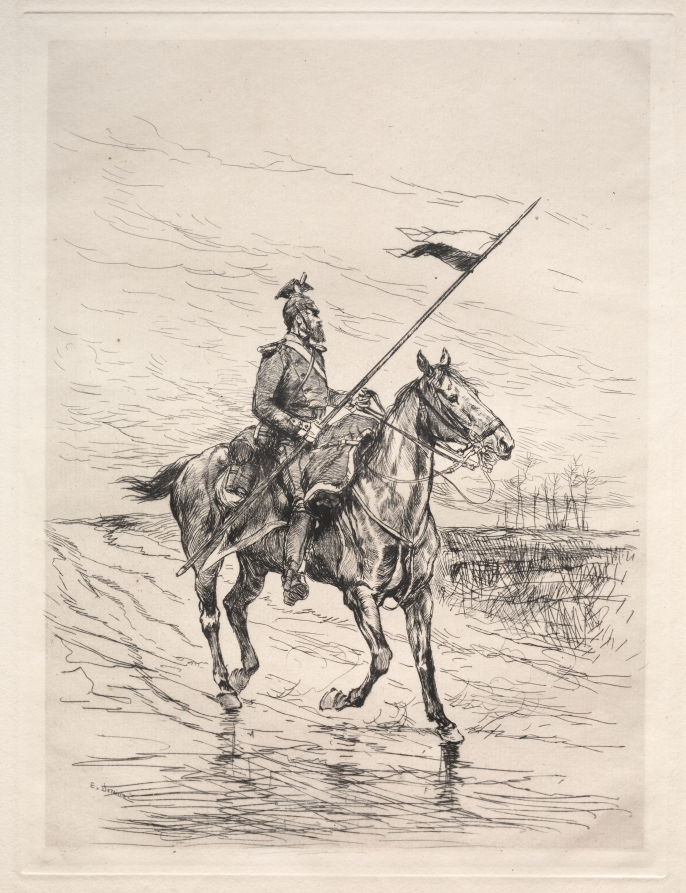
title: An Uhlan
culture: France, 19th century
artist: Édouard Detaille (French, 1848–1912)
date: 1874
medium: etching with drypoint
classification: Print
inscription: in plate, lower left: E. Detaille